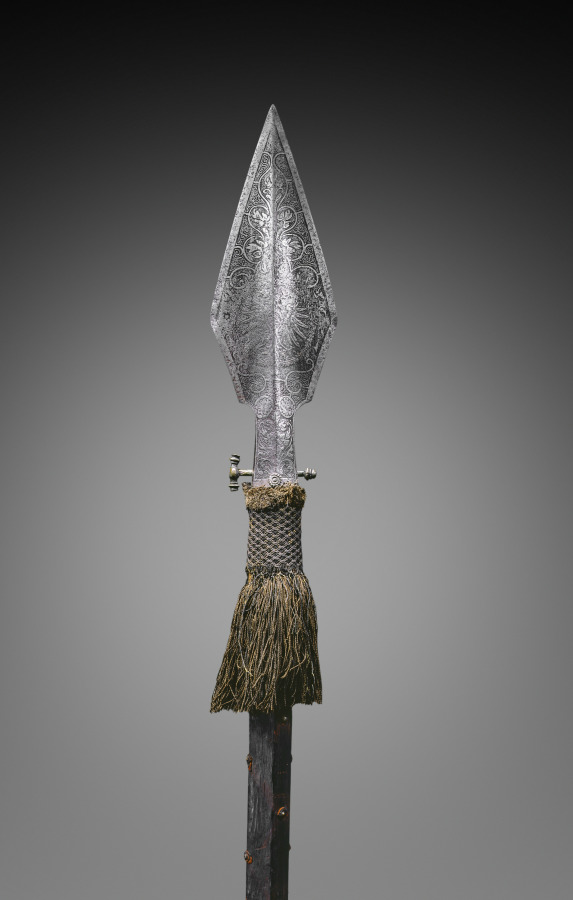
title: Parade Spear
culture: Germany, Augsburg?, 16th century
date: c. 1570–1600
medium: steel, etched; brass lugs; hexagonal wood haft with leather straps; woolen tassel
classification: Arms and Armor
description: This weapon is etched with the imperial Habsburg arms on one face and the Burgundian stave cross of St. Andrew on the other. In the 1500s, parade spears of this type became part of the insignia of infantry and light cavalry officers in the imperial army. In 1548 Titian painted an equestrian portrait of Emperor Charles V holding such a spear. At his abdication in 1556, Charles split the Habsburg inheritance between his son, Philip II of Spain, who was awarded control of Burgundy, and his brother, Frederick, who received the imperial title and the family's central European lands. This spear probably belongs to this later period and its purpose was likely ceremonial.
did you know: The Habsburg coat of arms, seen here, features a double-headed eagle.